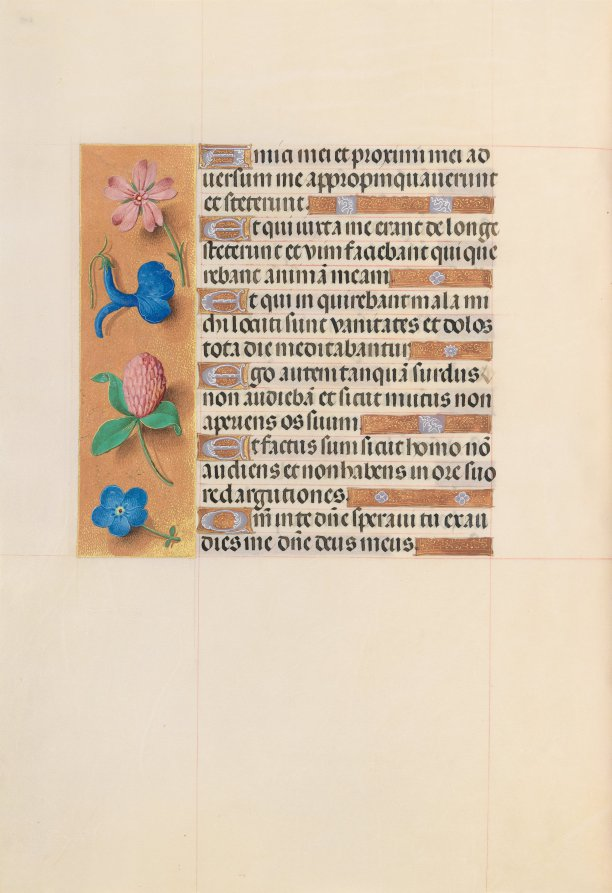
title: Hours of Queen Isabella the Catholic, Queen of Spain: Fol. 203v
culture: Flanders, Ghent and Bruges, late 15th century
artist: Master of the First Prayerbook of Maximillian (Flemish, c. 1444–1519)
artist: and Associates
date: c. 1500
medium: ink, tempera, and gold on vellum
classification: Bound Volume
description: This manuscript was illuminated by a circle of at least five highly organized manuscript painters active in the Flemish cities of Ghent and Bruges. The principal illuminator was Alexander Bening, who painted the majority of the book's miniatures. Manuscripts produced by this circle of artists are renowned for the decoration of their borders, which typically feature a rich variety of realistically-painted flowers, birds, and butterflies. This prayer book, called a book of hours, was intended not for a cleric, but for the private devotions of a lay person-in this case, Isabella the Catholic, Queen of Spain (1451-1504). Isabella's coat of arms embellishes the book's frontispiece. It is unlikely that the book was commissioned by the Queen herself; rather, she probably received it as a diplomatic gift from someone courting her patronage, perhaps Cardinal Francisco Jimenez de Cisneros. A Franciscan friar, Jimenez was dependent upon Isabella for his advancement, first to the post of Queen's confessor in 1492, and then to Archbishop of Toledo in 1495.